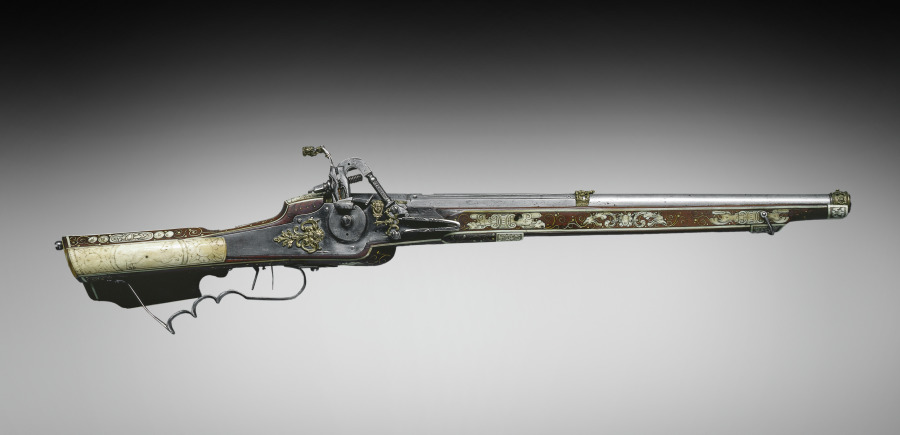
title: Wheel-Lock Rifle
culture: Germany, Bavaria (?), 17th century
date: 1618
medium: steel, brass, walnut stock inlaid with bone, horn and ivory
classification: Arms and Armor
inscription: on barrel: 1618, S.H.; on stock: FF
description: Made originally as a petronel pistol, this firearm seems to have been refitted with a new stock sometime during the 17th century to convert it into a rifle, most likely for a child's use.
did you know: The artisan who made this rifle used brass, bone, horn, and ivory to create decorative elements like animals involved in the hunt, fruits, and other details. If you look beneath the gun, you will see a goose or duck and a vase of flowers near the trigger.